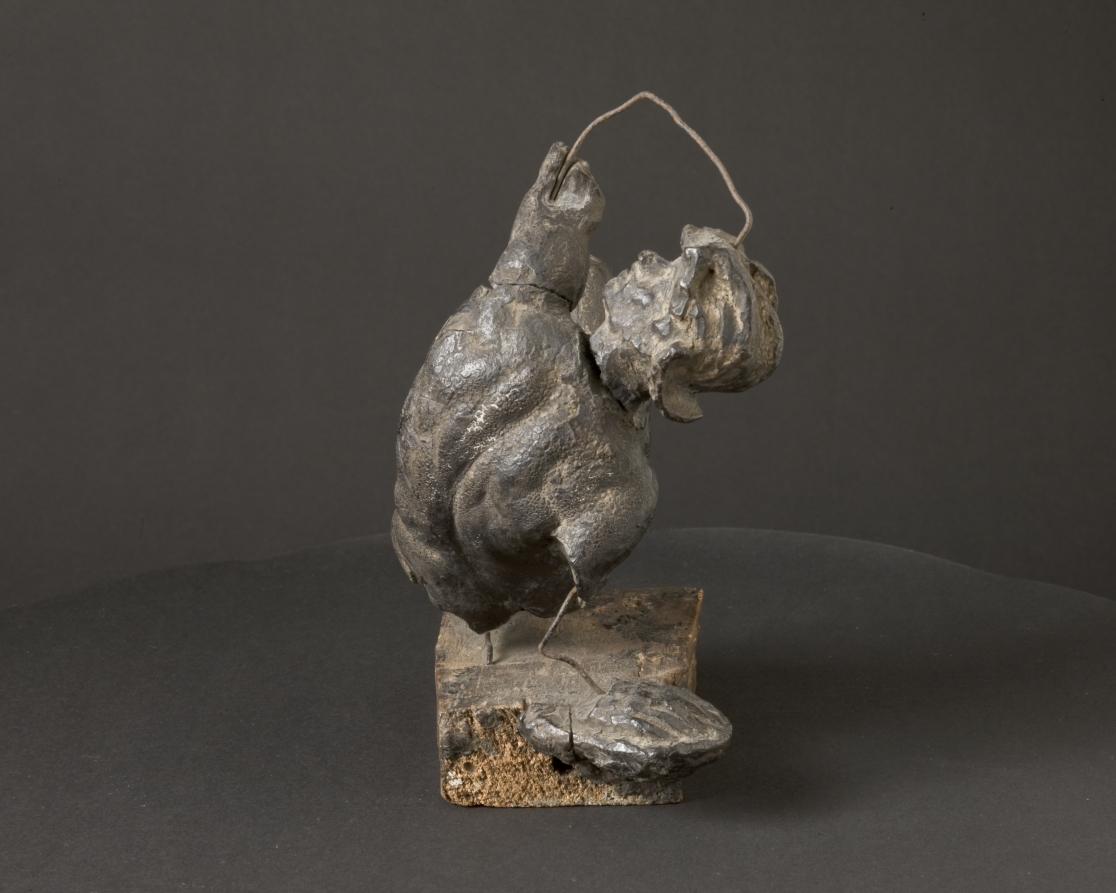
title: Model for a Fallen Warrior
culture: Italy, 16th century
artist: attributed to Giovanni Francesco Rustici (Italian, 1474–1554)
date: c. 1520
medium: wax on a metal armature, mounted on wood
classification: Sculpture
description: Giorgio Vasari (1511–1574), an influential writer and painter, notes in his biography of his contemporary Rustici, that the artist sculpted terracotta battle scenes of groups of horses "with men on their backs or under them." This wax model may be a study for such a group, showing a contorted, helmeted warrior bracing himself after falling to the ground. The figures for these projects were most likely inspired by those in Leonardo's monumental wall painting depicting the Battle of Anghiari for the Hall of the Five Hundred in the Palazzo Vecchio, Florence. Although the fresco was never completed, its pictorial scheme was well known. Rustici later collaborated with Leonardo, and was undoubtedly aware of the major commission and its dynamic portrayal of war.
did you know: Sixteenth-century sculptors often sketched their ideas in three dimensions using wax, clay, or stucco.